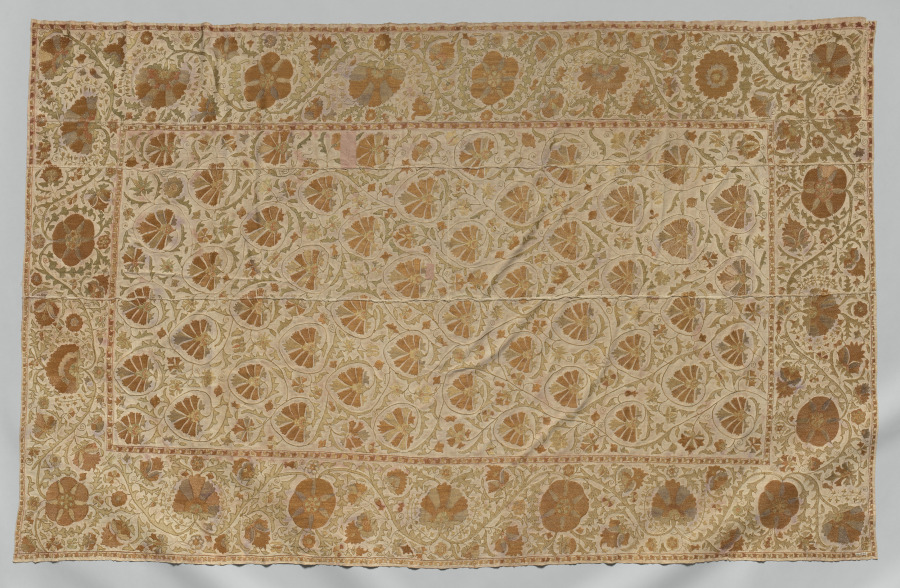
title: Embroidered Cover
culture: Uzbekistan, Bukhara, 19th century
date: 19th century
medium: embroidery: silk on cotton tabby ground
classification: Embroidery